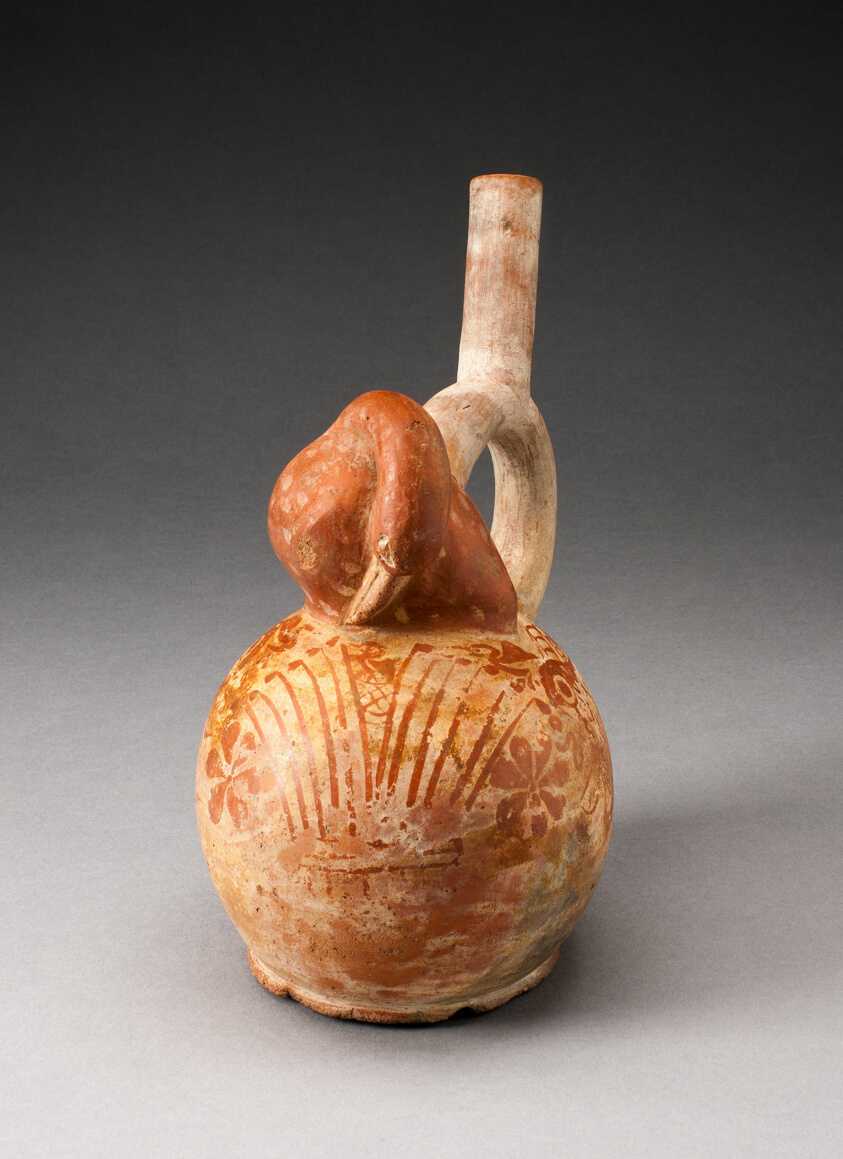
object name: Vessel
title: Handle Spout Vessel with Resting Bird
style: moche, mochica, early intermediate period, Pre-Columbian, americas, Arts of the Americas, andean, andes, south american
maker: Moche (North coast, Peru)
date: 100 BCE–500 CE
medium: Ceramic and pigment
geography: Peruvian North Coast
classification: earthenware; ceramics; vessel; art of the americas